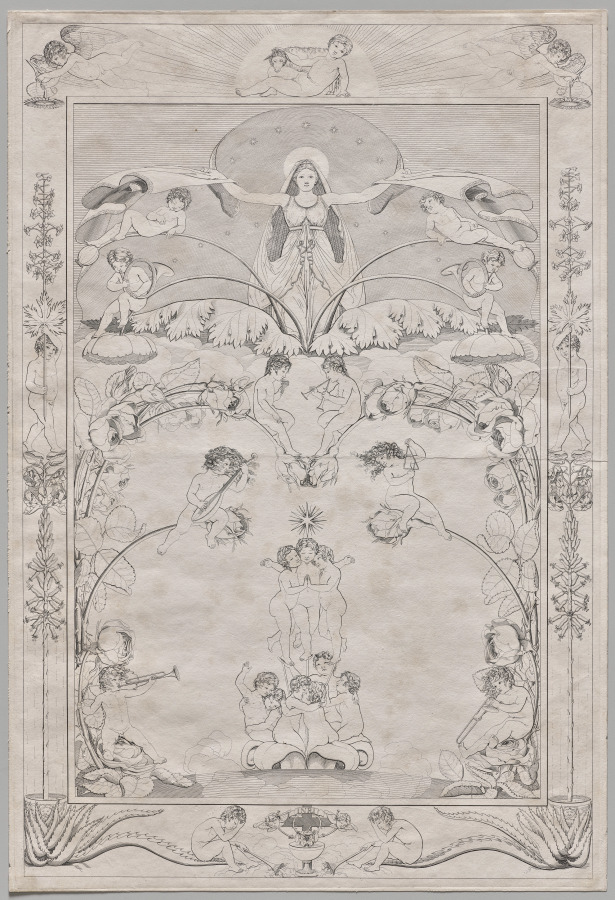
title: Evening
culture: Germany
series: Times of Day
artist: Philipp Otto Runge (German, 1777–1810)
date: 1803–5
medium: etching on heavy wove paper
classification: Print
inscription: Written in pencil on mat: "Abend"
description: Phillip Otto Runge’s large-scale, four-part print series, Tageszeiten (Times of Day), is a landmark of German Romantic printmaking, capturing the “new art” promoted by Runge and his contemporary, Caspar David Friedrich, one rooted in a more personal and spiritual response to nature. Runge presents allegories of nature as a means to understand God and the sublime on earth. His four-part series represents not only the four times of day but also the seasons and the stages of human life, while contrasting eternal time with human time through various literary and religious references. Viewing the series from Morning to Night, seedlings emerge from the earth, bloom, decay, and die. Young spirits or children are born, mature, and grow old, eventually entering a sleep reminiscent of death. A female figure appearing in two scenes, possibly Mother Nature, inspires abundance and then embraces its decline, suggesting nature’s continuity despite human mortality. In each plate, Runge contrasts eternal time with human time, or spirituality with physicality, by contrasting the iconography in the borders with that in the centers.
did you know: After receiving a set of Times of Day as a gift from the artist, the German author Johann Wolfgang von Goethe (1749–1832) apparently exclaimed, “it’s enough to drive you crazy—beautiful, and mad at the same time!”